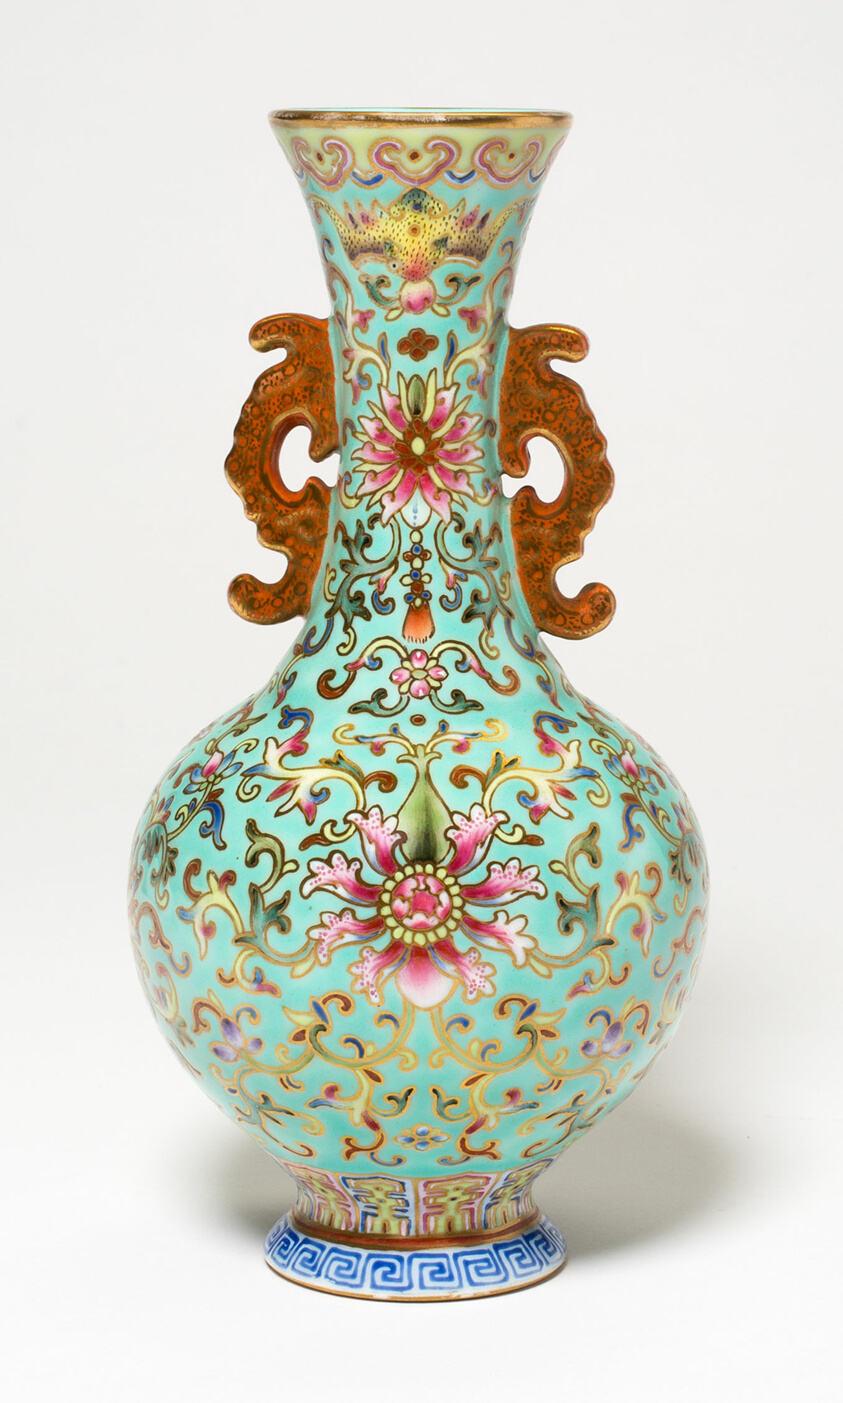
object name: Vessel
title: Vase with Dragon-Shaped Handles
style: Chinese (culture or style)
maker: China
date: Qing dynasty (1644–1911), Qianlong reign mark and period (1736–1795), probably late 18th century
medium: Porcelain painted in overglaze enamels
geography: China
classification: vase; vessel; ceramics